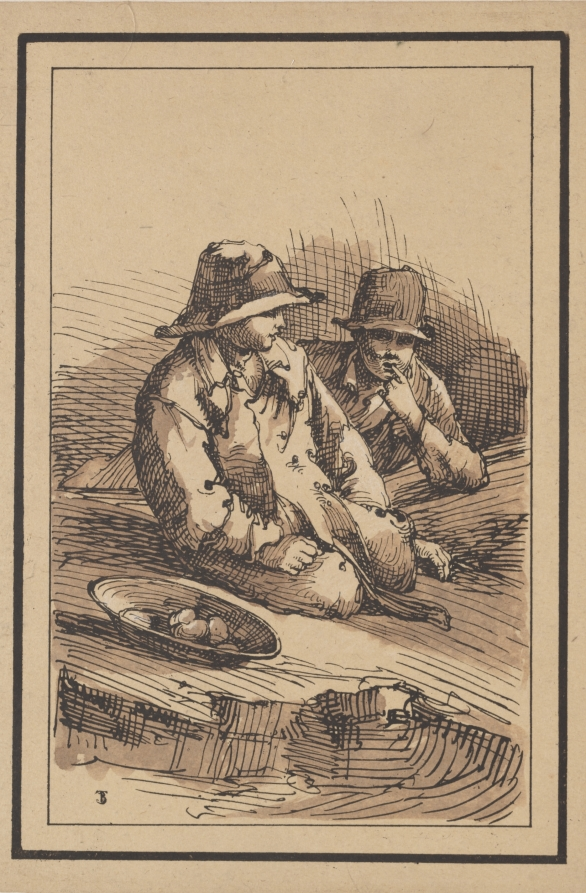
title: Rustic Figures: Two Boys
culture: England, early 19th Century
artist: Thomas Barker (British, 1769–1847)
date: 1801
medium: lithograph hand-colored with brown wash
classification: Print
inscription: initialed within the image TB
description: Lithography was invented in Germany in 1798 as a commercial technique but soon spread to England where it was quickly adopted by artists. This is one of the very earliest artist's lithographs which is very welcome in our fine collection of early lithography.